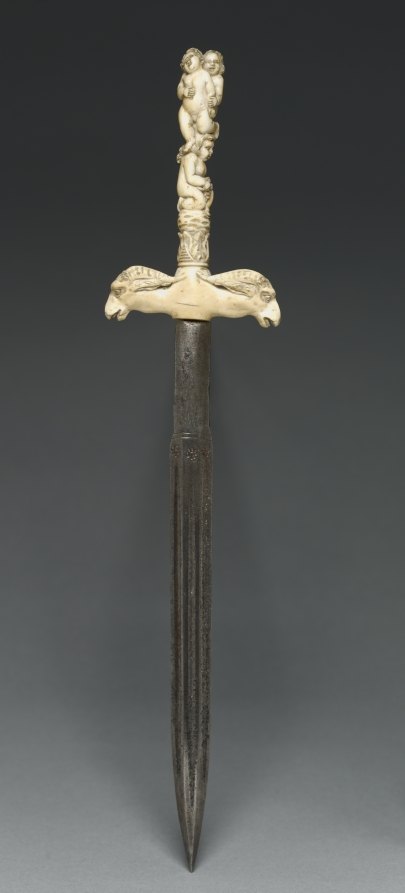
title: Dagger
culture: Italy, late 17th Century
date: late 1600s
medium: steel and ivory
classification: Arms and Armor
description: The carved grip of this dagger depicts the female followers of Bacchus, the Roman god of wine.